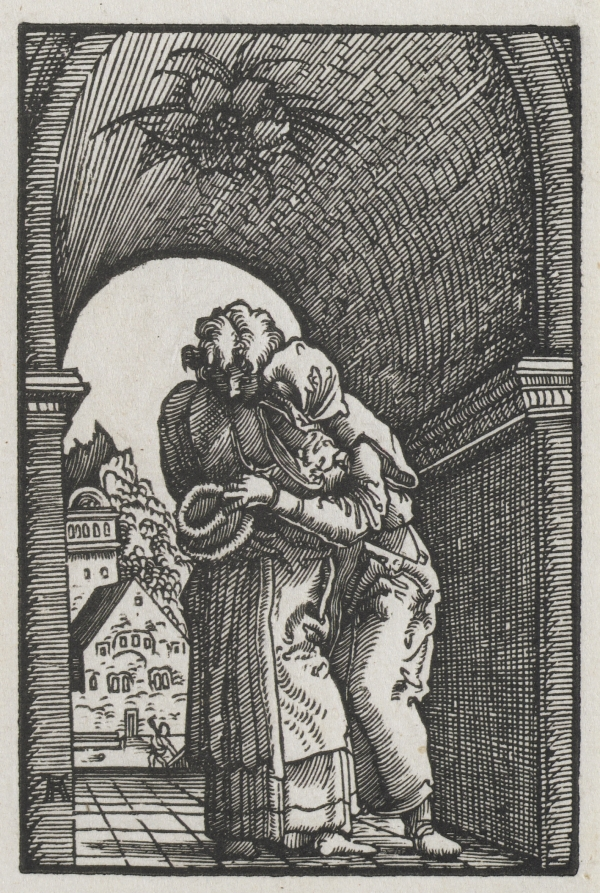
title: The Fall and Redemption of Man: The Embrace of Joachim and Anne at the Golden Gate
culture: Germany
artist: Albrecht Altdorfer (German, c. 1480–1538)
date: c. 1513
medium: woodcut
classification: Print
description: These eight woodcuts come from a series of forty which illustrate the story of Christian redemption from original sin to the Last Judgement. Probably to maximize printing efficiency and quality, eight woodblocks were printed on each of five sheets of paper, but the subjects are not in the correct chronological order. Prior to sale, the sheets were cut into eight pieces. The sheets in the museum's set were only cut in half, preserving four prints per page. The numbers after the titles of the individual images indicate each scene's place within the narrative. By 1513, Altdorfer had already executed a number of small, finely detailed engravings. Because it is difficult to achieve the same degree of precision using woodcut, The Fall and Redemption of Man is a technical tour de force. Probably inspired by Albrecht Dürer's Small Passion (1511)-but almost double the size-the only contemporaneous comparable set of fine miniature woodcuts, Dance of Death, was designed by Hans Holbein in about 1526 (on view nearby).